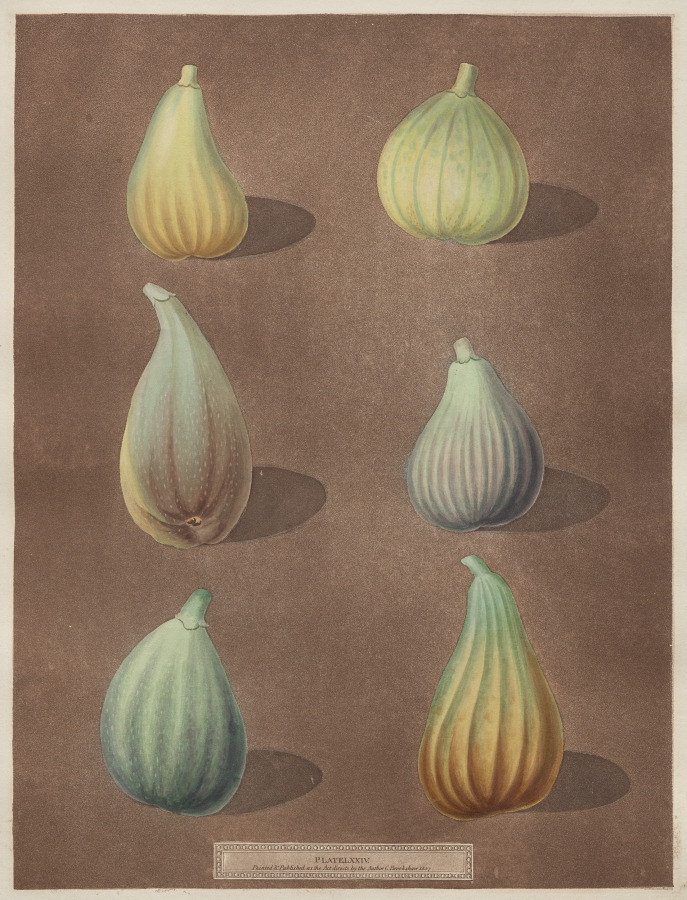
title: Pomona Britannica: No. 74 - Figs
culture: England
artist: Richard Brookshaw (British, 1736–1810)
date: 1807, published 1812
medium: aquatint and stipple engraving printed in color and hand colored on thick wove paper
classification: Print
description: This color aquatint etching is one plate from George Brookshaw’s 1812 illustrated volume Pomona Britannica. Named after the Roman goddess of fruit trees, gardens, and orchards, Brookshaw intended the volume to be the English “country gentleman’s” guide to the science of classifying and identifying fruits (pomology). Many of Brookshaw’s models came from the Royal Gardens at Hampton Court and Kensington Gardens. Each print featured one fruit, often life-size, including detailed depictions of its flower and leaves. Printed in color with hand-painted highlights, this and other illustrated botanicals formed an essential part of the cultured English library in the early 19th century.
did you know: Originally from the Mediterranean, figs were cultivated in England as early as the 1580s.